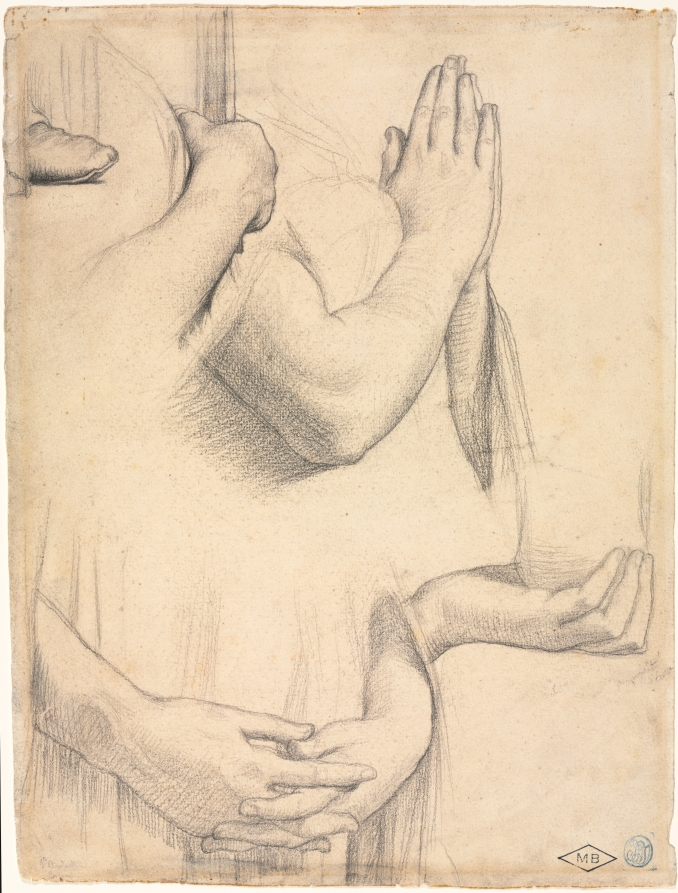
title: Study of Hands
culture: France, 19th century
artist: Jean-Auguste-Dominique Ingres (French, 1780–1867)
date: 1842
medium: graphite with traces of white heightening on ivory laid paper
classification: Drawing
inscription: inscribed, at bottom left, in pencil: Ste [illegible]; middle right (beneath knuckles), in graphite: Ste Marguerite / d’Ecosse; upper left (beneath foot), in graphite: Clotild; upper left (between toes and wrist), in graphite: Clotild; stamped, at lower right, in black ink: Marc Bernheim [Lugt 3528]; in blue ink: the artist’s studio stamp [Lugt 1477]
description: This sheet of studies was made as a preparatory design for a series of stained glass windows for the Chapel of Saint Ferdinand in Paris. Here, Jean- Auguste-Dominique Ingres sketched four sets of hands that seem to cascade down the page in one rhythmic motion, masterfully illustrating the beauty of mise en page. In his use of graphite, Ingres alluded to the metalpoint drawings of Raphael, intentionally channeling the Renaissance master.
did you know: Ingres executed many studies for each of his stained glass designs, from preliminary sketches such as this one to full-scale cartoons.